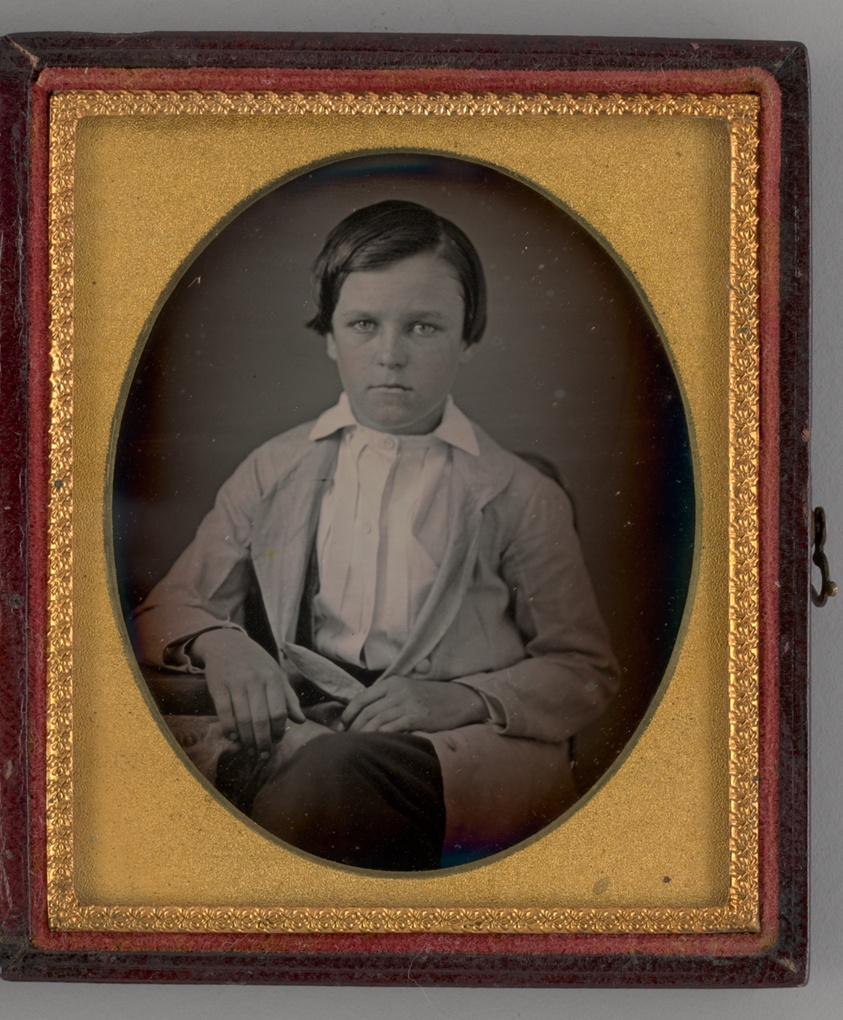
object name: Photograph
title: Untitled (Portrait of a Boy)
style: 19th century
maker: Unknown maker; American, 19th century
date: 1850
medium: Daguerreotype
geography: United States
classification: portrait; photograph; photographic process; photography; portrait; daguerreotype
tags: lundberg collection, portrait, Male, boys, portraits, portraits: child subject